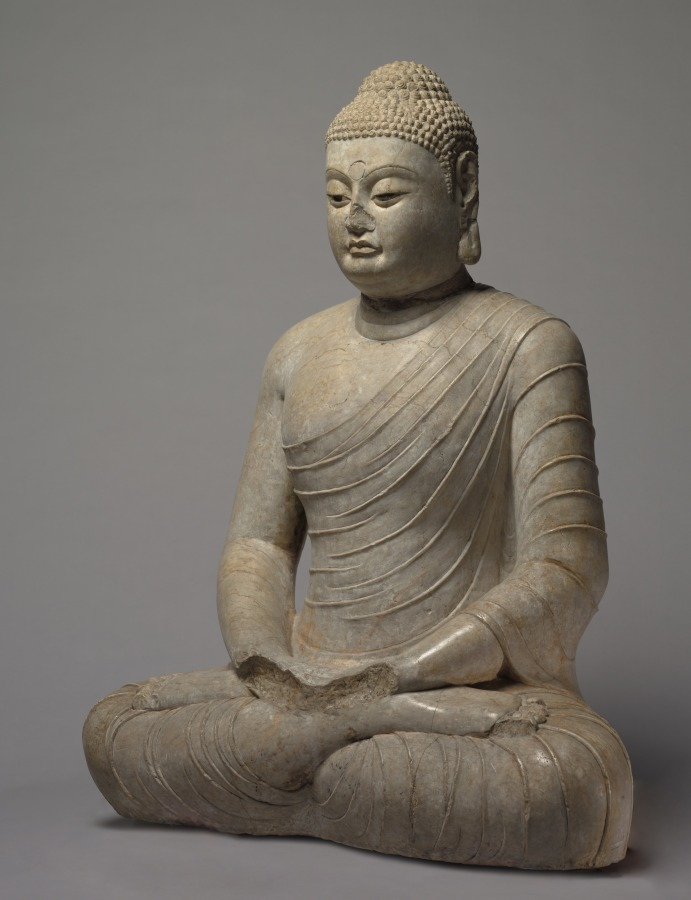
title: Seated Amitayus Buddha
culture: China, Northern Qi dynasty (550-577)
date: c. 570s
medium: marble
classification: Sculpture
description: Amitayus, the Buddha of Infinite Life, is seated in meditation on a double lotus pedestal. The pedestal was not made with the statue but the combination is faithful to the original artistic conception. The statue is an extremely rare example of a major type of Northern Qi Buddhist sculpture. The heavy, massive front highlights the sense of monumentality and the spiritual essence of the Buddha. Today the sculpture is united with a pedestal that exhibits the rich, ornate style of early Tang sculpture. It was commissioned by the Duke of Liang, Fang Xuanling (578–648), for the blessing of his second son and daughter-in-law, the Tang imperial princess of Gaoyang. The iconography and inscription suggest that it originally went with a statue, now missing, of Shakyamuni, the historical Buddha, instead of Amitayus.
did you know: The stringlike folds of the Buddha's draperies emphasize his monumental, rigidly erect torso and tubular limbs.